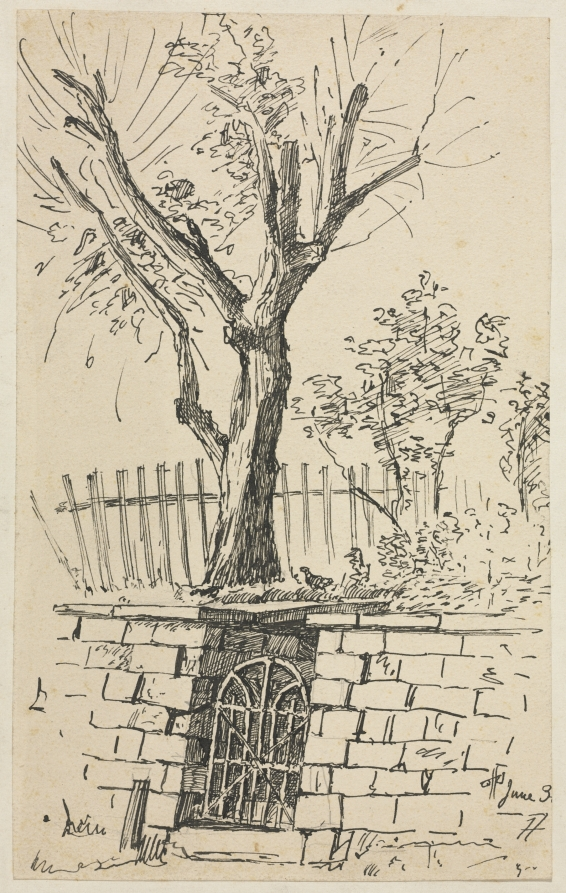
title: Tree on Top of a Stone Wall, Cleveland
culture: America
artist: Otto H. Bacher (American, 1856–1909)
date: c. 1870–1909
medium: ink on paper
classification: Drawing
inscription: Signed: "Otto, June 3"